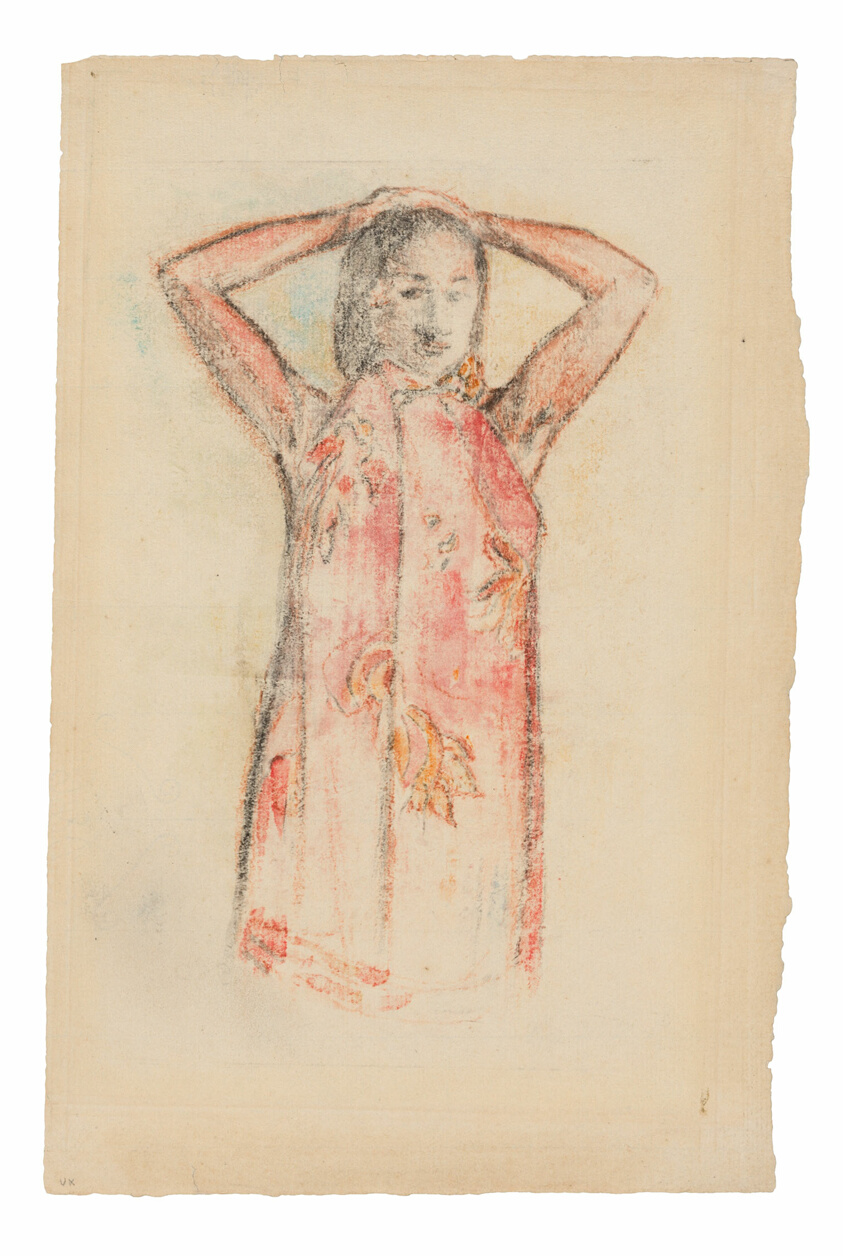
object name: Drawing and Watercolor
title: Tahitian Girl in a Pink Pareu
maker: Paul Gauguin (French, 1848-1903)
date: 1894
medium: Watercolor monotype from a paper matrix on cream laid paper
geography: France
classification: monotype; watercolor; print; prints and drawing; paper; drawings (visual works)